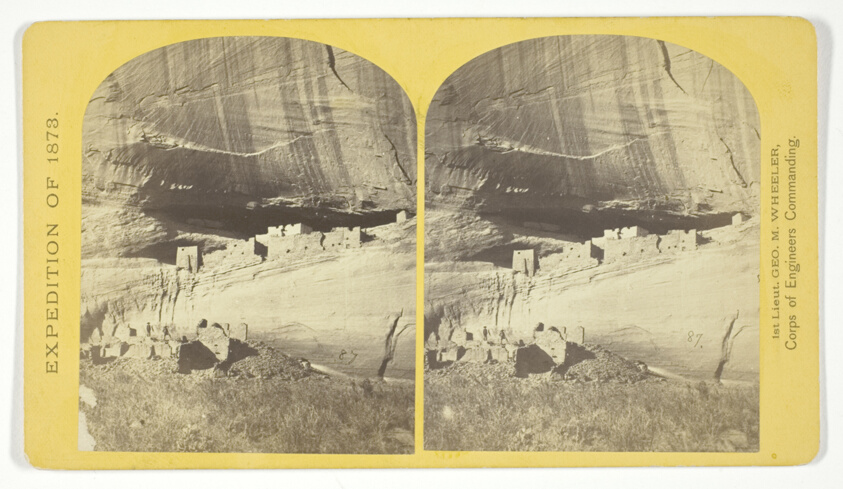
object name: Photograph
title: Ruins in Cañon de Chelle, N. M., in a cavity in the wall, 60 feet above present bed of Cañon. Height of walls about 700 feet. The present race of Indians know nothing of the age of these buildings of who occupied them, No. 21 from the series "Geographical Explorations and Surveys West of the 100th Meridian"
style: 19th century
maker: Timothy O'Sullivan (American, born Ireland, 1840–1882); commissioned by George Wheeler for the War Department, Corps of Engineers, U.S. Army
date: 1873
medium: Albumen print, stereo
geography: United States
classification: stereograph (albumen); photography; photograph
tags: Collected by Hugh Edwards, Geographical Explorations and Surveys